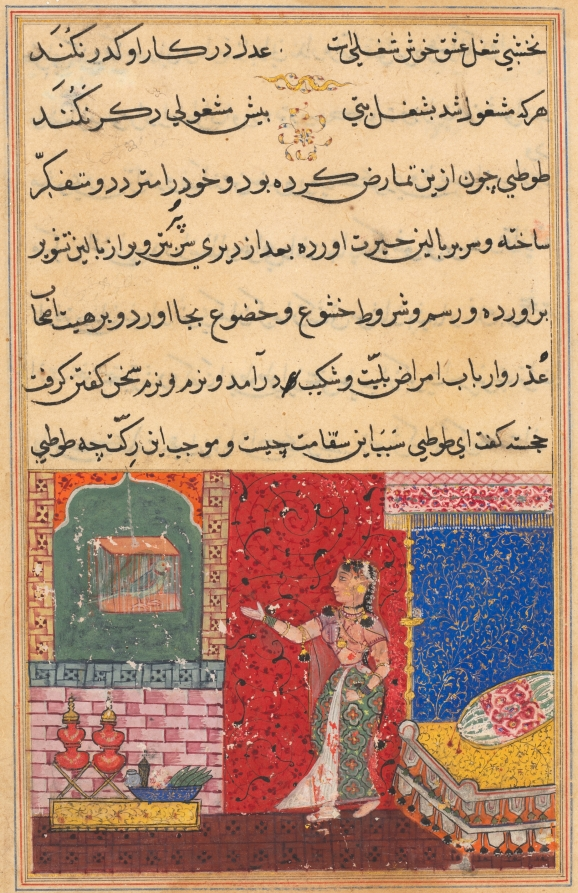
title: The Parrot Addresses Khujasta at the Beginning of the Fifteenth Night, from a Tuti-nama (Tales of a Parrot)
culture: India, Mughal court, 16th century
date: c. 1560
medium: gum tempera, ink, and gold on paper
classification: Painting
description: Panels of bold color are closely reminiscent of local Indian painting traditions, as seen in the page to the left. The artist here is experimenting with depicting three-dimensionality in the angled rendering of the bed, the placement of Khujasta’s feet on the plane of the floor, and the parrot who stands in the space of his cage. In comparison to the figures in The Sage Narada tells King Kamsa of Vishnu’s Impending Incarnation to the left, Khujasta’s gesture is less pertly angular, and her face has smaller features and gentler contours. Falsely encouraging her to go meet her lover, the parrot tells her that if she doesn’t go, and her husband returns, she would regret not having gone to see him just as the cat repented having killed the mice. She must then hear the story of why a cat would regret killing mice.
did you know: The stacked red jugs on the left are water pots.